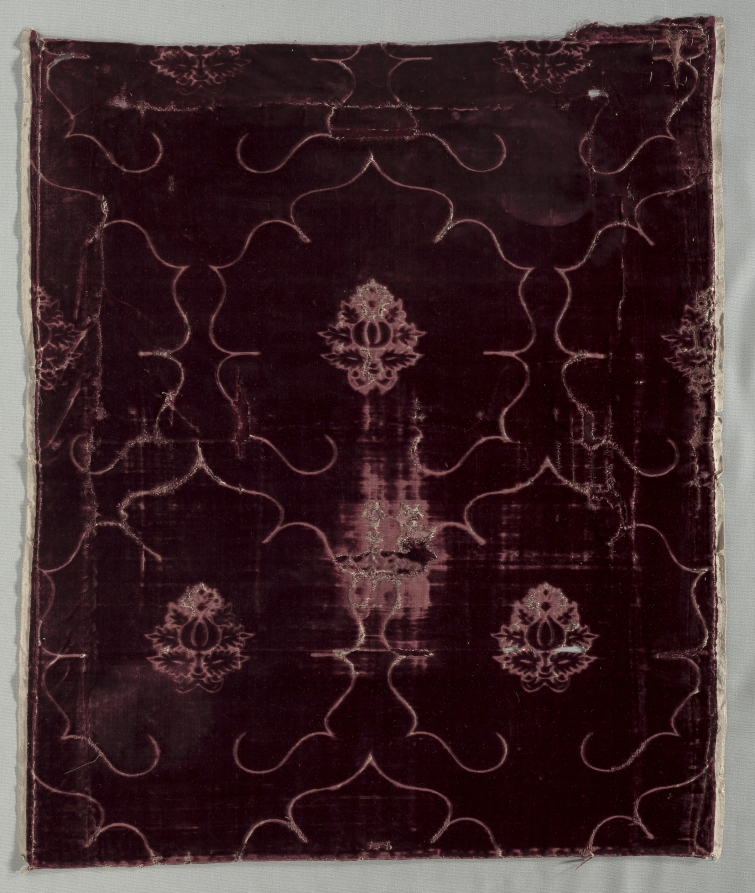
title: Velvet Fragment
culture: Italy, 15th century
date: 1400s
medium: velvet (cut and voided); silk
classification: Velvet